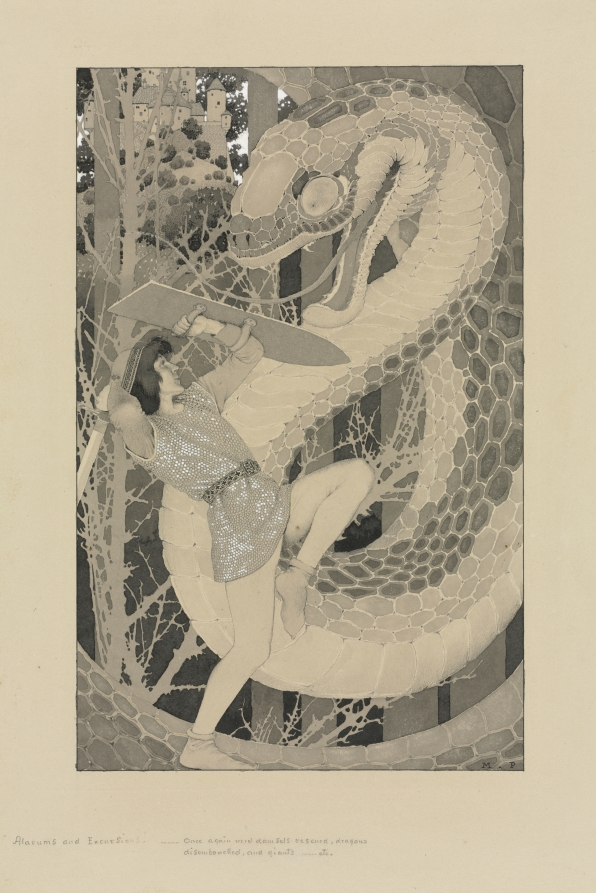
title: Alarums and Excursions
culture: America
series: The Golden Age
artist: Maxfield Parrish (American, 1870–1966)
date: 1899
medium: brush and black and gray wash, with white gouache, over graphite, framing lines in pen and black ink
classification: Drawing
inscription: signed in image, lower right, in black watercolor: M . P; lower left, by artist, across bottom margin, in graphite: "Alarums and Excursions." . . . Once again were damsels rescued, dragons / disembowelled, and giants . . . etc.; verso, by artist, in top half: no. 225 [inside a box] / Maxfield Parrish. / "The Oaks" / Windsor: Vermont. / June of 1899.; on fragment of old mount, now removed, in brown ink: Original pen + ink drawing by Maxfield Parrish. / Being one of the illustrations of "The Golden Age" / by Kenneth Grahame (John Lane Co. 1899); on fragment of old mount, now removed: B[ought?] of Frd'k Keppel Co. / 1899-$50-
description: Alarums and Excursions is one of nineteen illustrations the young Maxfield Parrish created for Kenneth Grahame’s The Golden Age, a children’s book published in 1899. In the chapter Alarums accompanies, the narrator persuades a friend to join him in a make-believe of Arthurian legends. Parrish depicted one of the boys in the midst of their playful fantasy, as he prepares to strike an enormous, coiled serpent. Parrish rendered the scene in crisp detail, using flat, delicate washes of monochrome ink, strong linear contours, and scintillating pricks of white gouache on the boy’s chainmail. Parrish’s designs found mainstream success in a variety of print media, making him one of the best-known illustrators of the 20th century.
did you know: Parrish employs a technique called sgraffito (“to scratch”) on the serpent’s tongue, producing its mottled texture by scraping away the upper layer of paper.